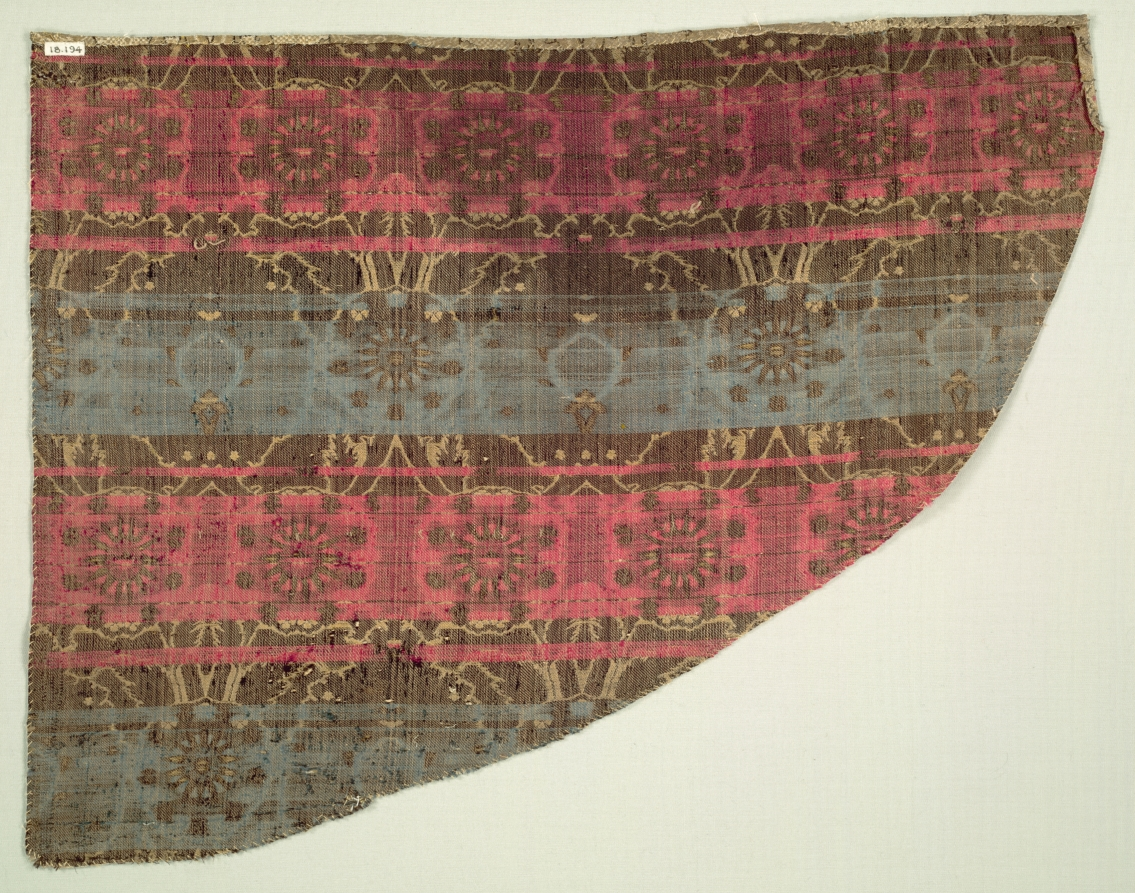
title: Lampas with double ogival floral pattern on checkered ground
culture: Turkey, Istanbul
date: 1550–1575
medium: lampas: silk and gilt-metal thread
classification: Textile